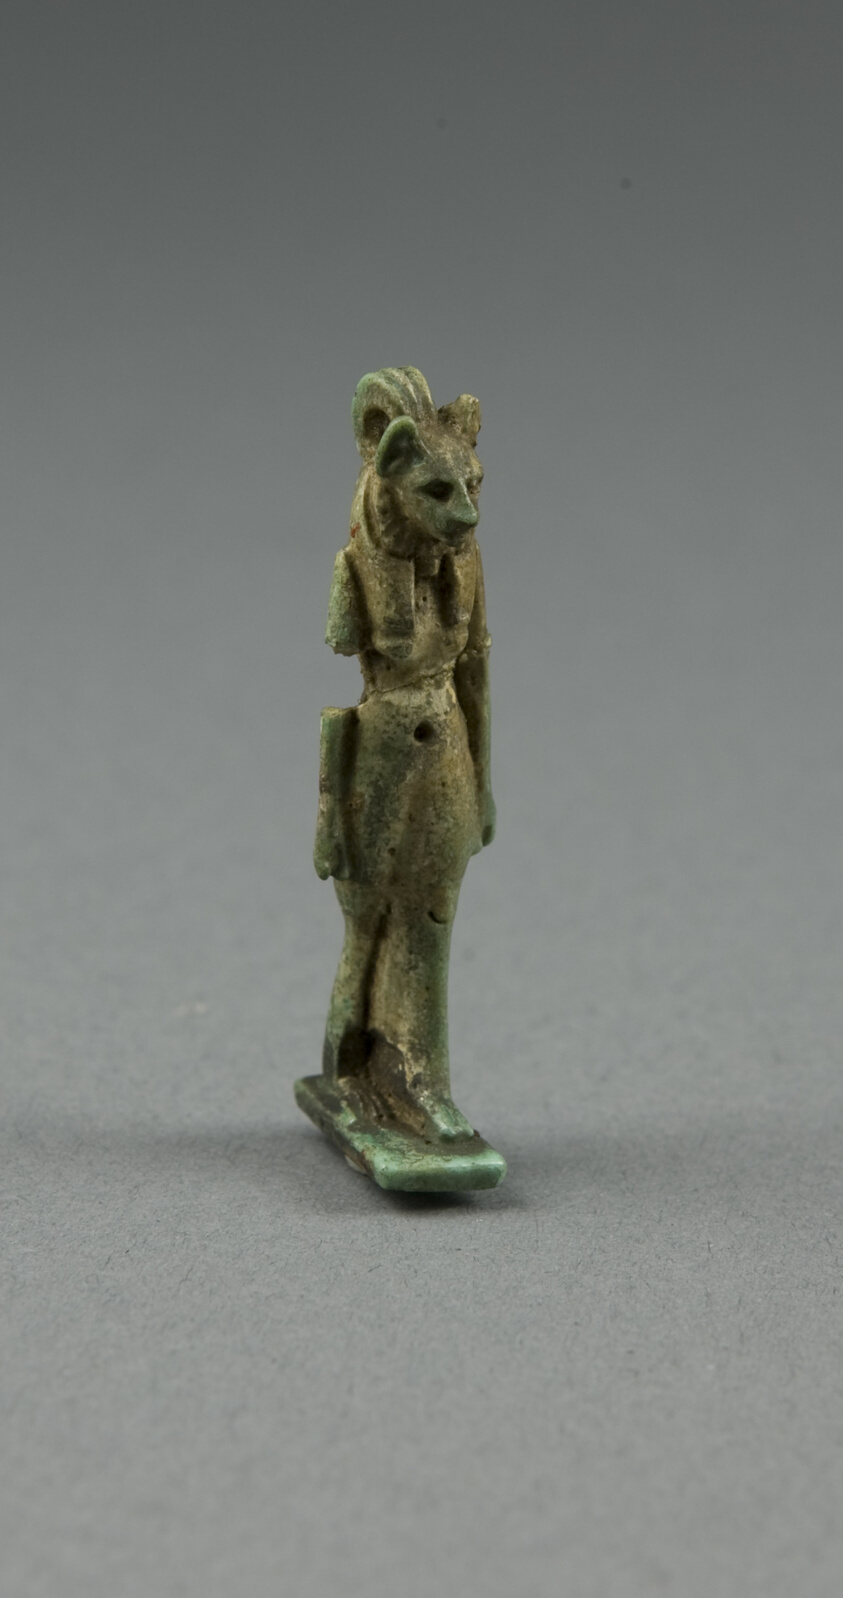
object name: Costume and Accessories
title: Amulet of the Goddess Bastet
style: third intermediate period, egyptian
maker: Egyptian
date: Third Intermediate Period, Dynasty 21–25 (1069–656 BCE)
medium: Faience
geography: Egypt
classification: amulet; jewelry; ceramics; ancient art; costume; faïence (composite material)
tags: goddesses